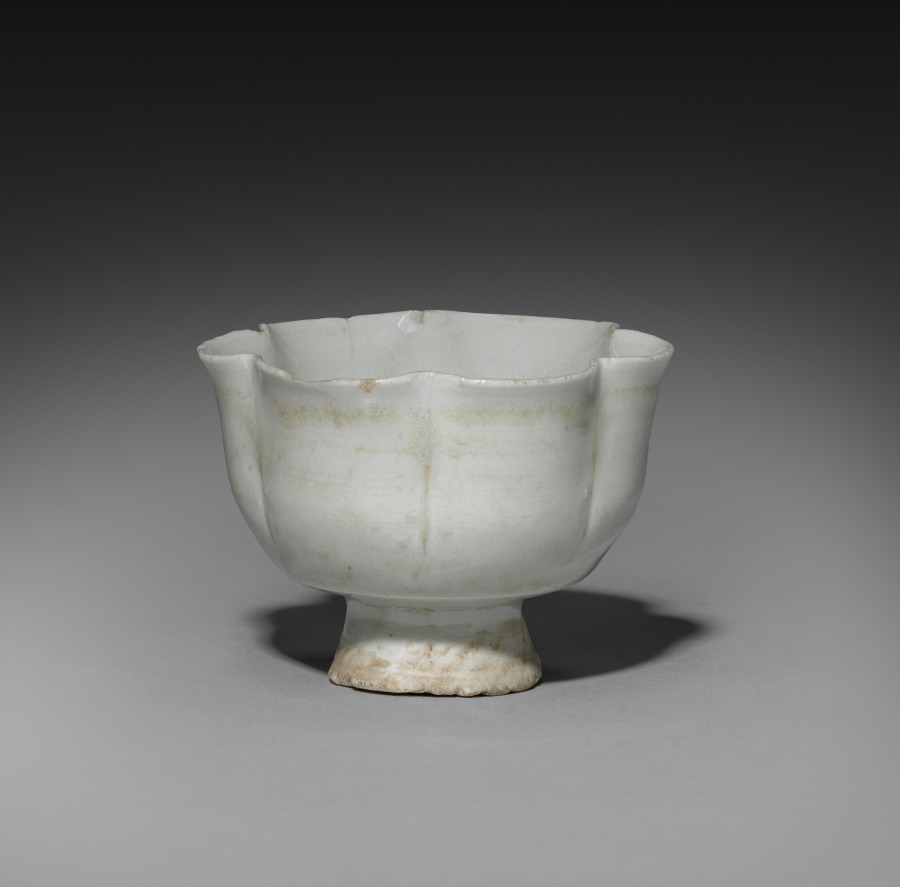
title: Cup and Stand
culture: Korea, Goryeo dynasty (918–1392)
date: 918–1392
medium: pottery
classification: Ceramic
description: As early as the seventh century, the practice of drinking tea and wine became an important part of elite culture in Korea. Elites of the Goryeo period commissioned a variety of types of utensils and vessels including this delicate-looking cup and cup stand, not only to make their drinking experience more exciting, but also to show their refined taste.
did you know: Elites of the Goryeo period are known for their love of drinking tea and wine. Many sophisticated tea wares such as this example were buried in the tombs of ruling elites.